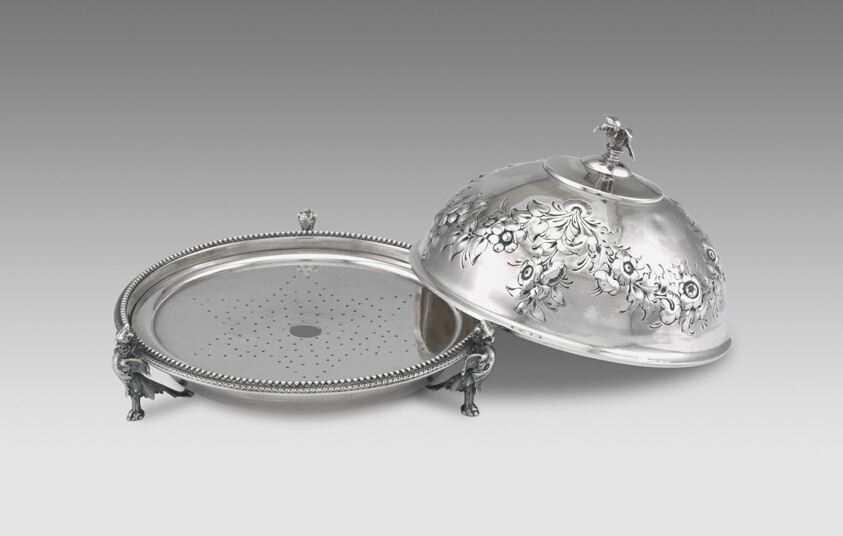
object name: Metalwork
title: Butter Dish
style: 19th century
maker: Gorham Manufacturing Company (American, founded 1831); Providence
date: 1853–65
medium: Silver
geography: Providence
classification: vessel for serving food; dish (vessel); silver; american decorative arts; american arts; decorative arts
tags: butter dish, birds, flowers, eagles, dining, eating